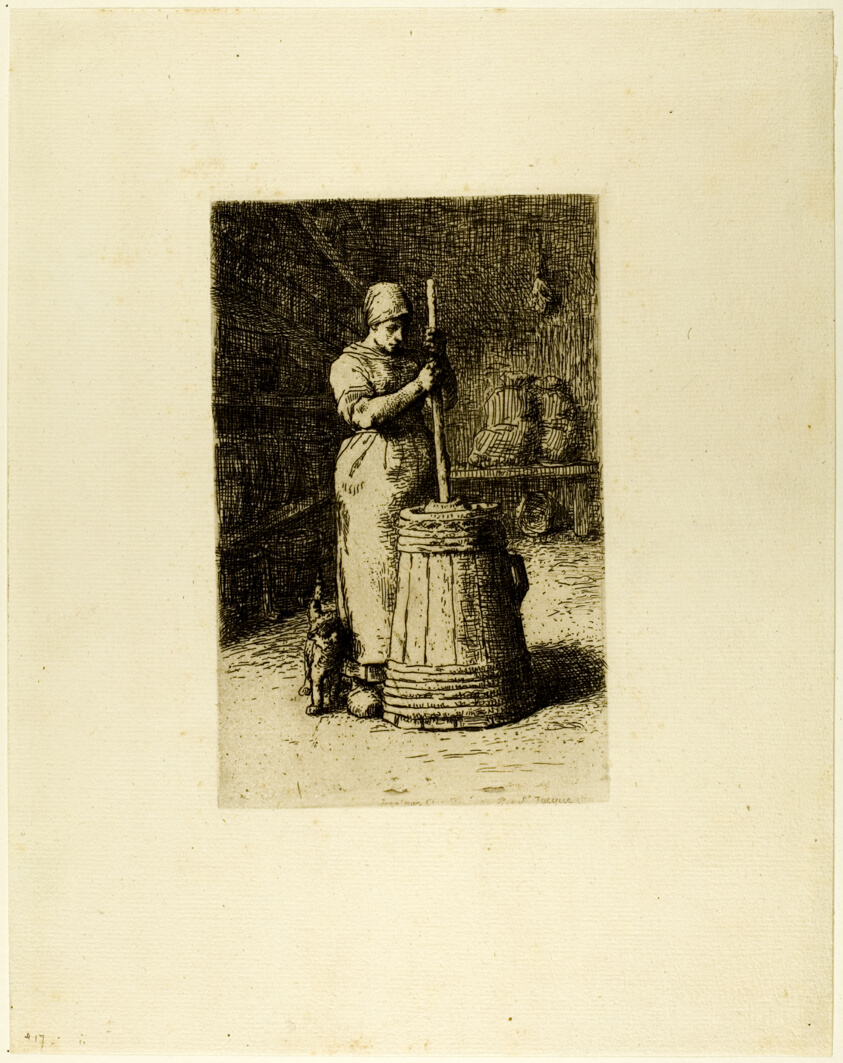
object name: Print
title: A Woman Churning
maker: Jean François Millet (French, 1814-1875); printed by Auguste Delâtre (French, 1822-1907)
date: 1855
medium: Etching and drypoint on ivory laid paper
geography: France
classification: etching; print; prints and drawing